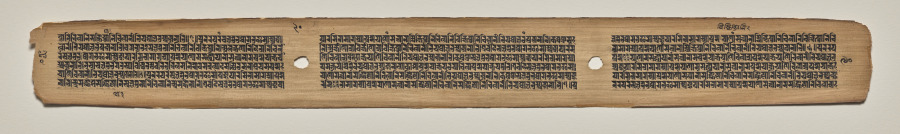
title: Text, Folio 90 (verso), from a Manuscript of the Perfection of Wisdom in Eight Thousand Lines (Ashtasahasrika Prajnaparamita-sutra)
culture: Eastern India, Bihar, Vikramashila Monastery. Painting: Nepal, Kathmandu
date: Sunday, September 14, 1119 (year 239 of the Newar Samvat in the month of Ashvina)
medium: gum tempera and ink on palm leaf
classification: Painting